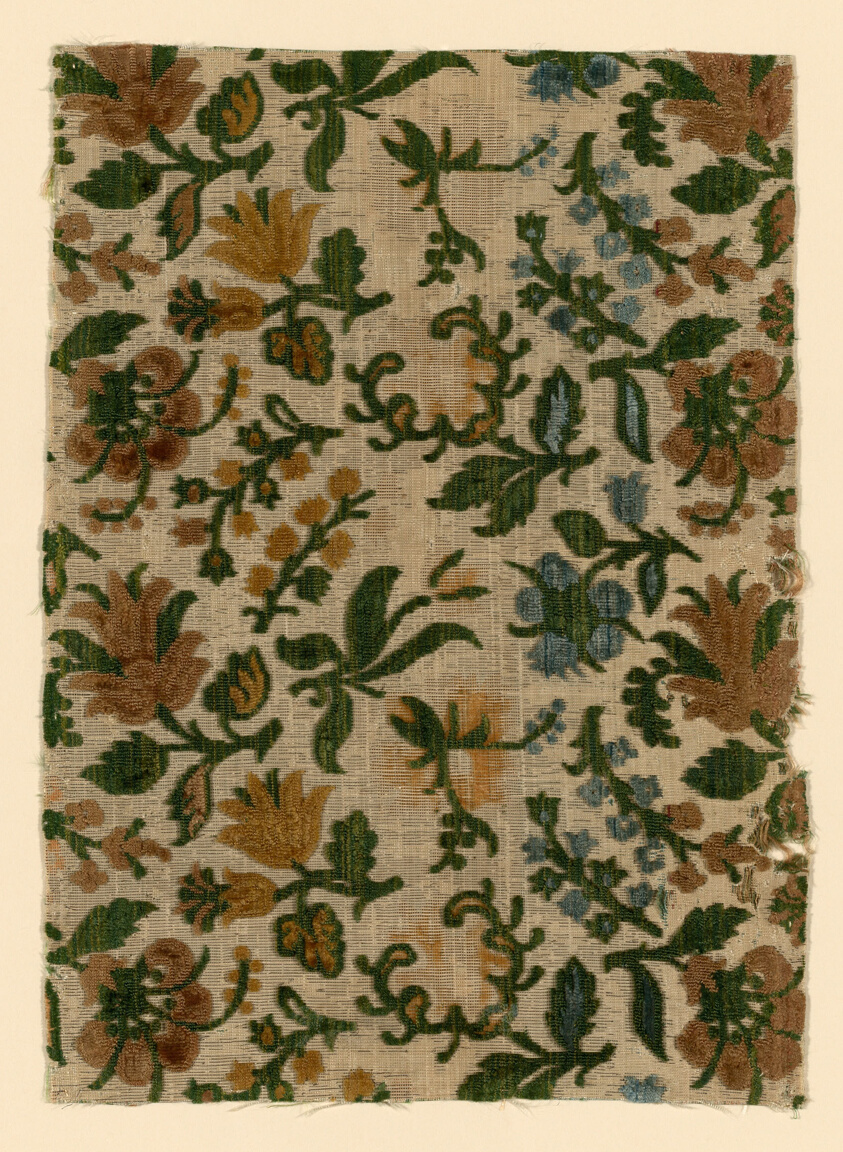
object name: Textile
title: Fragment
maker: Italy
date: 1601/25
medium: Silk, cut, uncut, and voided velvet with additional patterning wefts in gold foil against plain weave foundation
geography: Italy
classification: textile; weaving - velvet; weaving